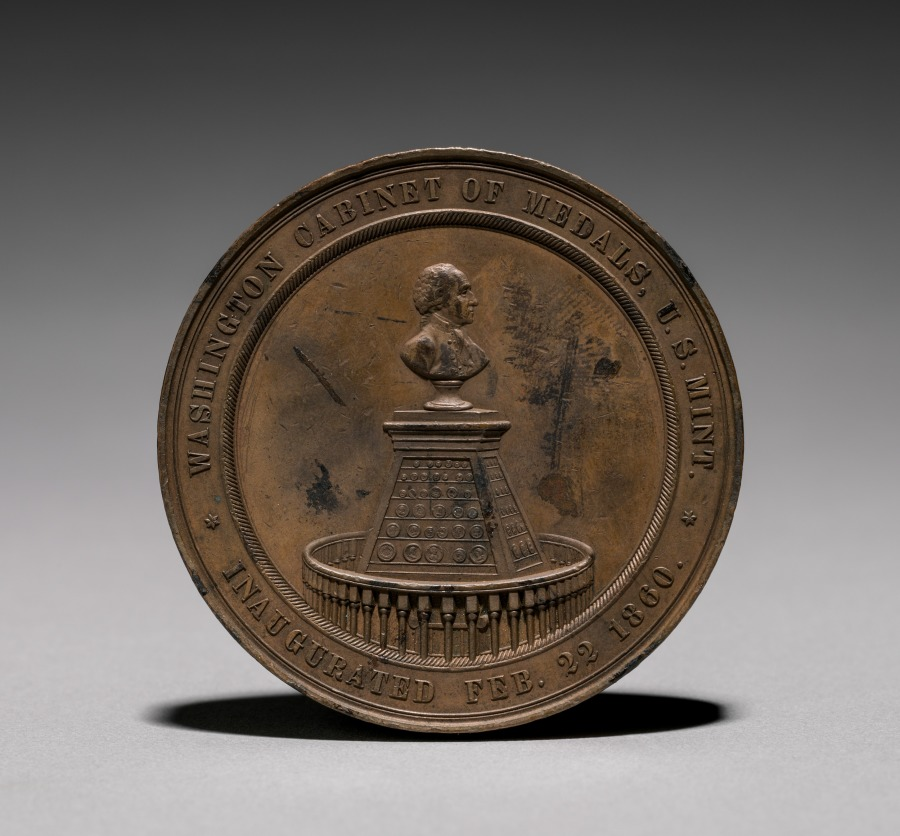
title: Medal: George Washington (reverse)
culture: France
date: 1860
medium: bronze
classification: Metalwork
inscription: Washington Cabinet of Medals, U.S. Mint. Inaugurated Feb. 22, 1860.